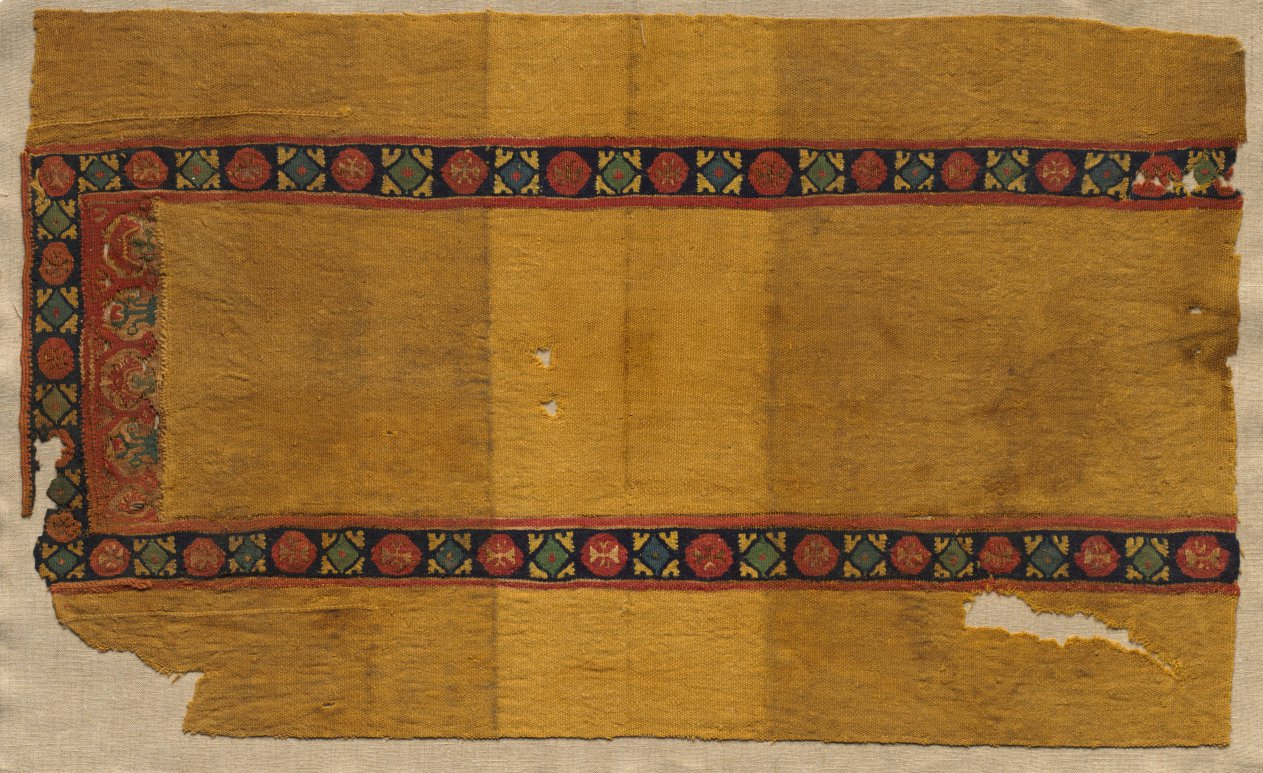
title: Fragment of a Tunic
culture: Egypt, Byzantine period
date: 400s - 600s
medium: tabby weave with inwoven tapestry ornament, linen and wool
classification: Textile